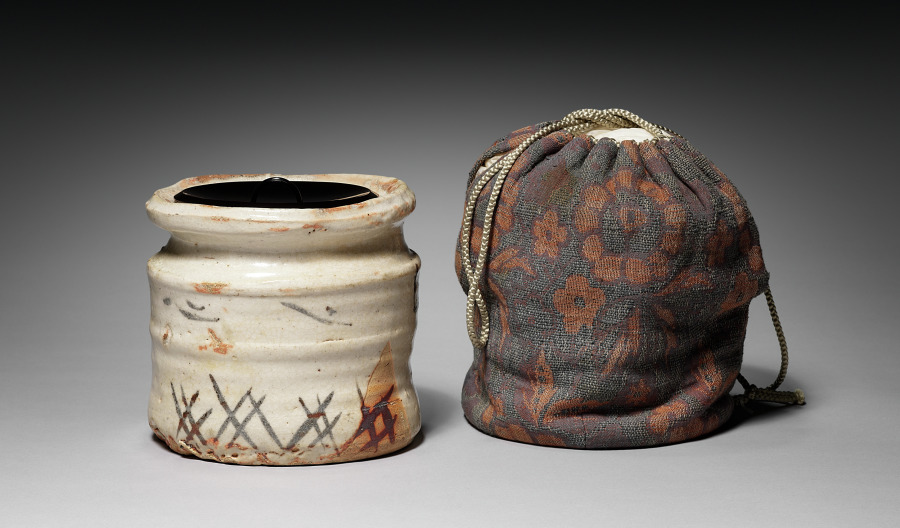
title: Water Container (Mizusashi) with Riverscape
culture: Japan, Momoyama period (1573-1615) to Edo period (1615-1858)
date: late 1500s–early 1600s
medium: Stoneware with underglaze iron oxide slip decoration (Mino ware, Shino type) and lacquer lid (modern replacement)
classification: Ceramic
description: Mizusashi are jars used to hold water for the preparation of tea at tea gatherings. This one was produced in the Mino area of present-day Gifu Prefecture in central Japan. It is called a “picture Shino” (e-shino) mizusashi, as it has an abstracted design on one side, said to resemble an ink painting of reeds and small boats along a riverbank, and a geometric pattern on the other. With its irregular shape and thick, luminous glaze, it is of a variety favored by eminent tea masters of the Momoyama period.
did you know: The water this container held during a tea gathering was used to fill the kama, or iron pot in which the water is heated.